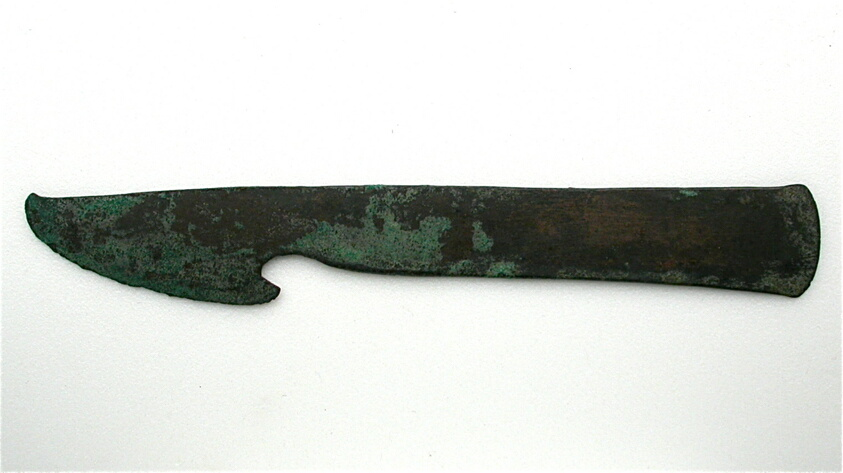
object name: Sculpture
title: Razor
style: egyptian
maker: Egyptian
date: New Kingdom, Dynasty 18 (about 1550–1295 BCE)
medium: Bronze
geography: Egypt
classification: utensil; bronze; metal; ancient art; sculpture